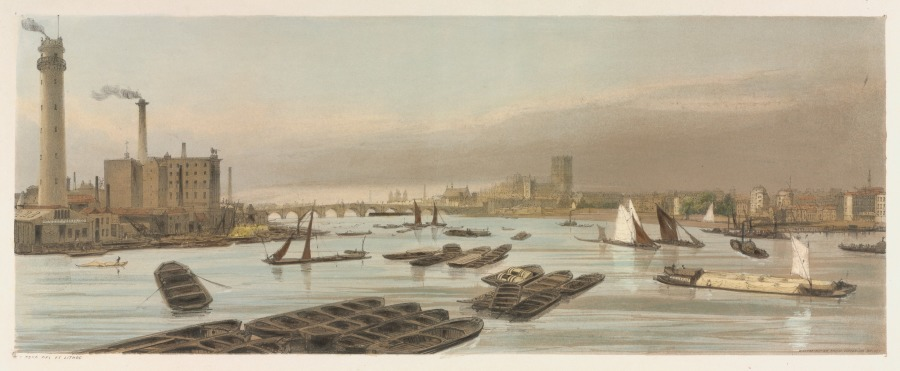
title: London As It Is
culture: England, 19th century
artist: Thomas Shotter Boys (British, 1803–1874)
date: 1842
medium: lithograph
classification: Bound Volume